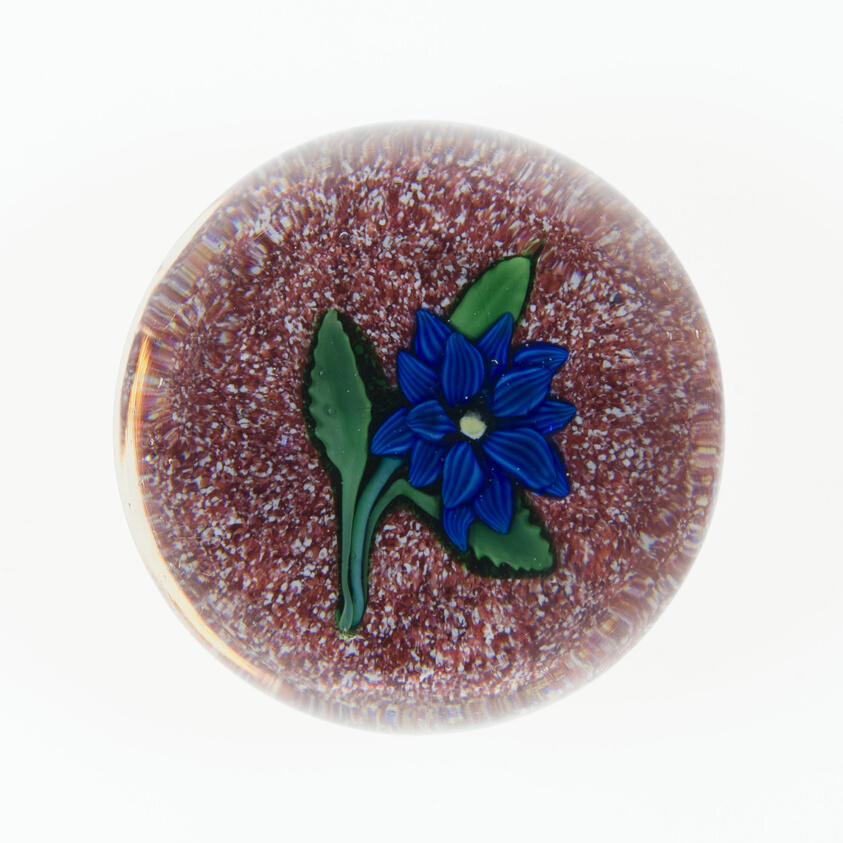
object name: Glass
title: Paperweight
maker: Saint-Louis Glassworks (Cristalleries de Saint-Louis); Lorraine, France, founded 1586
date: c. 1848–55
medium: Glass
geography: Saint-Louis-lès-Bitche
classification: paperweight; lampwork; european decorative arts; glass